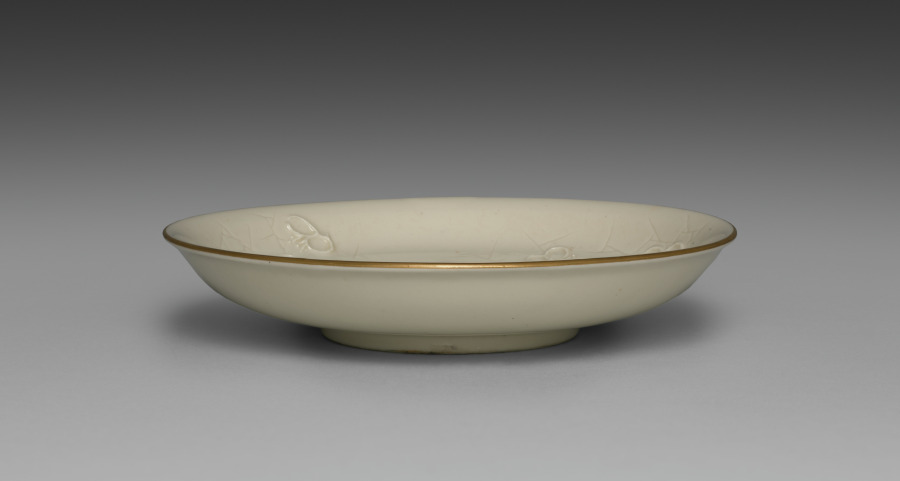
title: Medium-sized Dish from Dining Set with Plum Blossoms and Cracked-Ice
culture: Japan, Meiji period (1868–1912)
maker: Seifū Yohei II (Japanese, 1844–1878)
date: c. 1875–78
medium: Porcelain with molded designs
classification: Ceramic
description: Each item in this set has a delicate low-relief design of flowering plum branches over scattered, intersecting lines meant to resemble the cracked-ice surface of a frozen body of water and is signed on the base in gold pigment. While Yohei II produced many fine works in underglaze blue, like those produced by Kiyomizu Shichibei, he also made works in quite different styles later in his career, from the early 1870 s. In 1873, he was appointed purveyor to the Industrial Center of Kyoto Prefecture, a designation associated with Kyoto’s efforts to reach an international market through the port of Kobe; and from 1875 until his death, he was involved in national-level projects to present Japanese ceramics across the world. It was during this period that Yohei III was apprenticed to Yohei II, and it has been suggested that this set may in fact be an early example of Yohei III’s work, which he signed with his teacher’s name. Decorated with flowers resembling Japanese textile motifs, the set calls to mind the design of Yohei II’s pair of vases with plum blossoms in the Victoria and Albert Museum. Here, the elaborate trees created for a formal public exhibition setting have been translated into the approachable blossoms of the genteel domestic environment. While the designs are consistent across the pieces, each raised flower petal and pistil and each incised line in the ice was done by hand, so the cups, bowls, and dishes are similar yet unique. The bottoms of two boxes once identified the set’s owner, but the information has been deliberately obscured with black ink. However, inscriptions still visible appear to indicate two occasions, once at the end of July 1886 , and once again in June 1916 , when parts of the set were requested from Hokura in Niigata Prefecture. The location corresponds to a neighborhood in the present-day city of Jōetsu. The surname Tsuji 辻 also appears on a paper tag affixed to one of the box cloths. Future research may possibly reveal more about their provenance. A vase by Yohei III in a private collection combines the formal grandeur of the Yohei II vases in the Victoria and Albert Museum with the gentler design of this dining set, placing flowering plum trees against soft, scalloped-edge clouds resembling those in golden screens.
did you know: The dining wares have a creamy white coloration that the four boxes containing them identify as Korean in style.